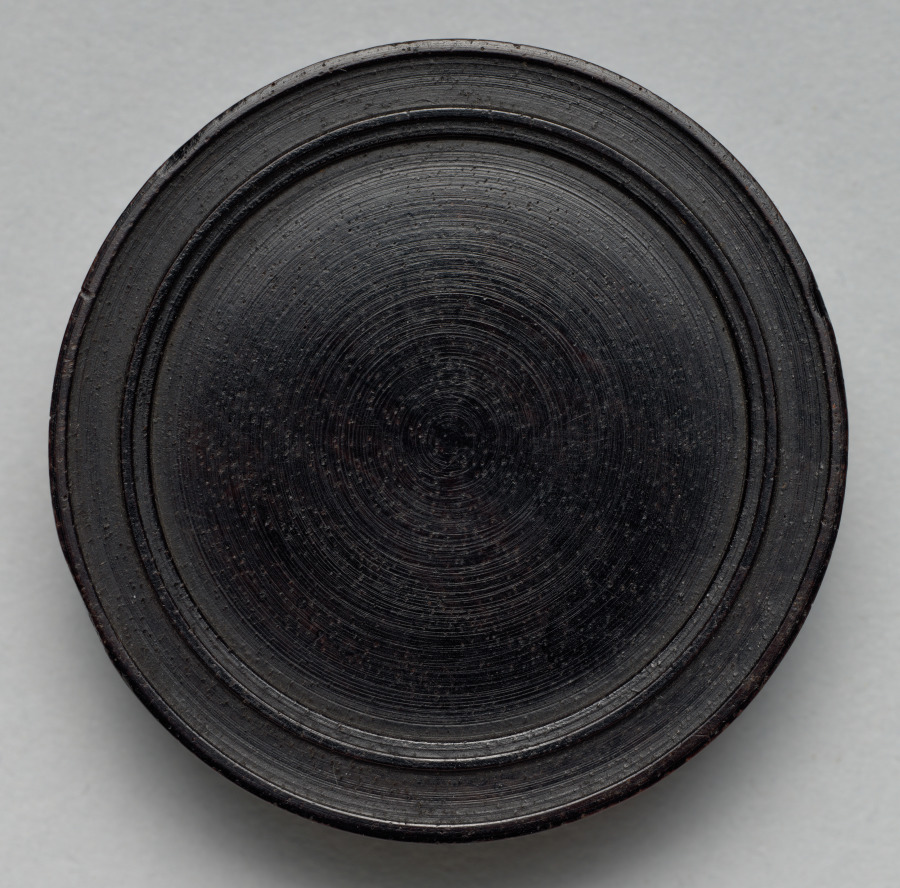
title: Gaming Piece (obverse)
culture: Germany, late 17th-early 18th Century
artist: Martin Brunner (German, 1659–1725)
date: c.1700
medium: wood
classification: Furniture and woodwork